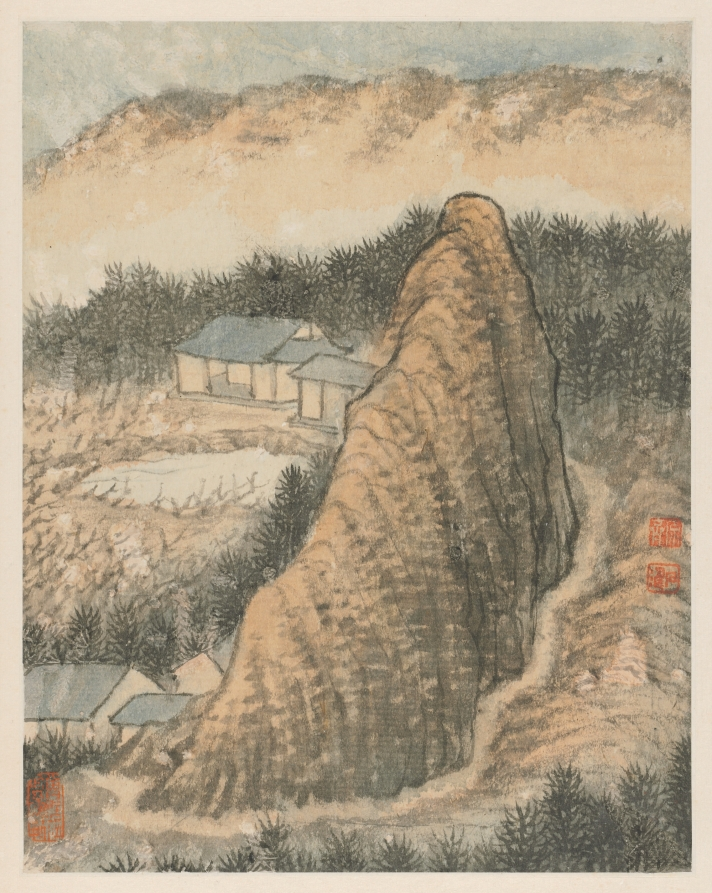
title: Reminiscences of Qinhuai River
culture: China, Qing dynasty (1644-1911)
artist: Shitao (Chinese, 1642–1707)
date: 1642–1707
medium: album leaf, ink and color on Song paper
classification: Painting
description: Shitao’s skillfully rendered composition suggests a sweeping movement from the base of the central rising mass, silhouette of forest, and a bright bend of misty atmosphere under the distant hills, to form almost a continual circle of energy—a gentle vortex. That is a perfect embodiment of the early Qing ideal of a momentous flow, with suggestion of the subterranean veins and linkages.